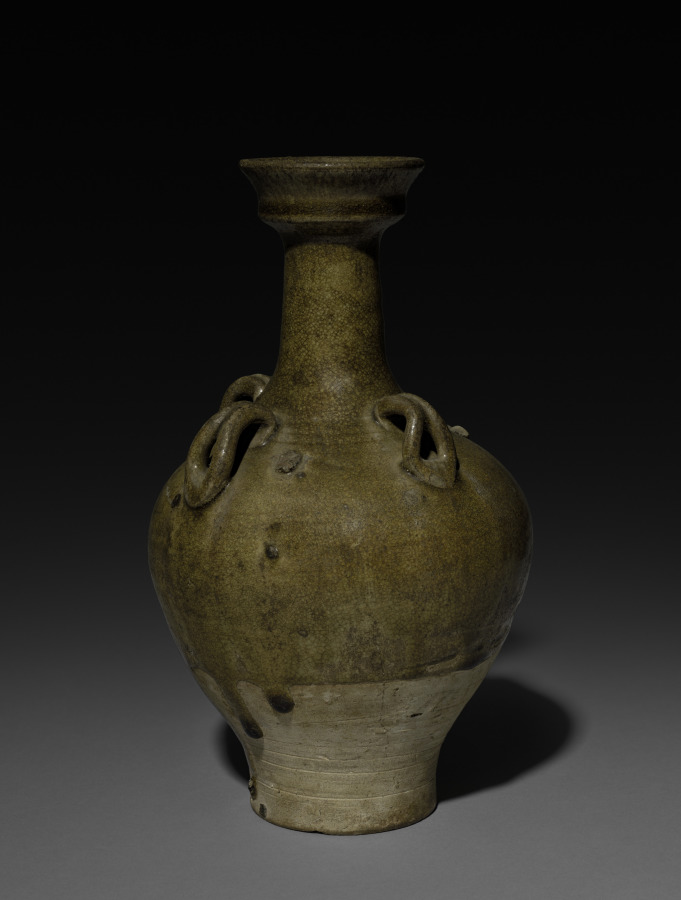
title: Vase with Loop Handles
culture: China, Sui dynasty (581-618)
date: 581–618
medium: glazed stoneware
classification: Ceramic